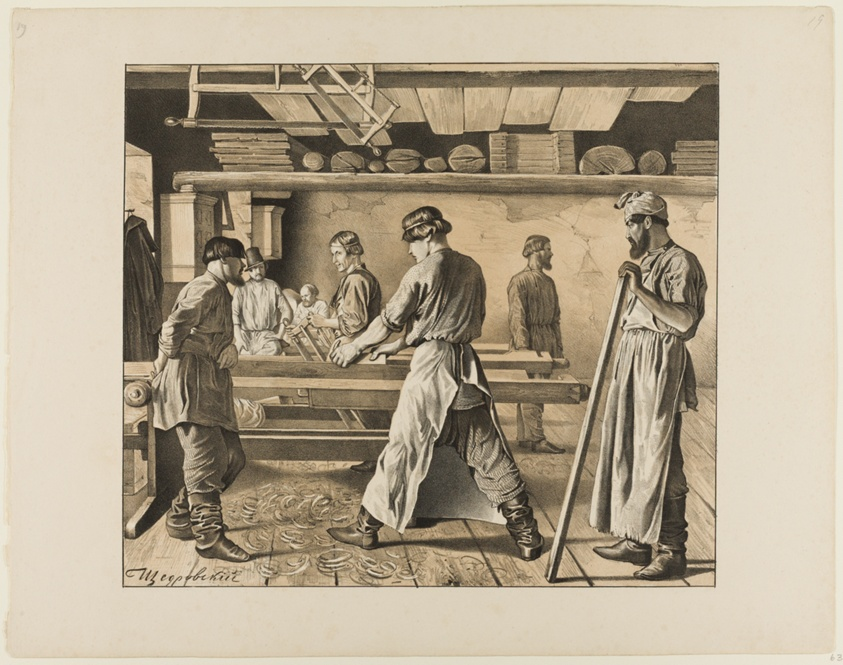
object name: Print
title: Scenes from Russian Folk Life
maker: Ignatii Stepanovich Shchedrovskii (Russian, 1815-1870)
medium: Color lithograph on paper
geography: Russia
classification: lithograph; print; prints and drawing